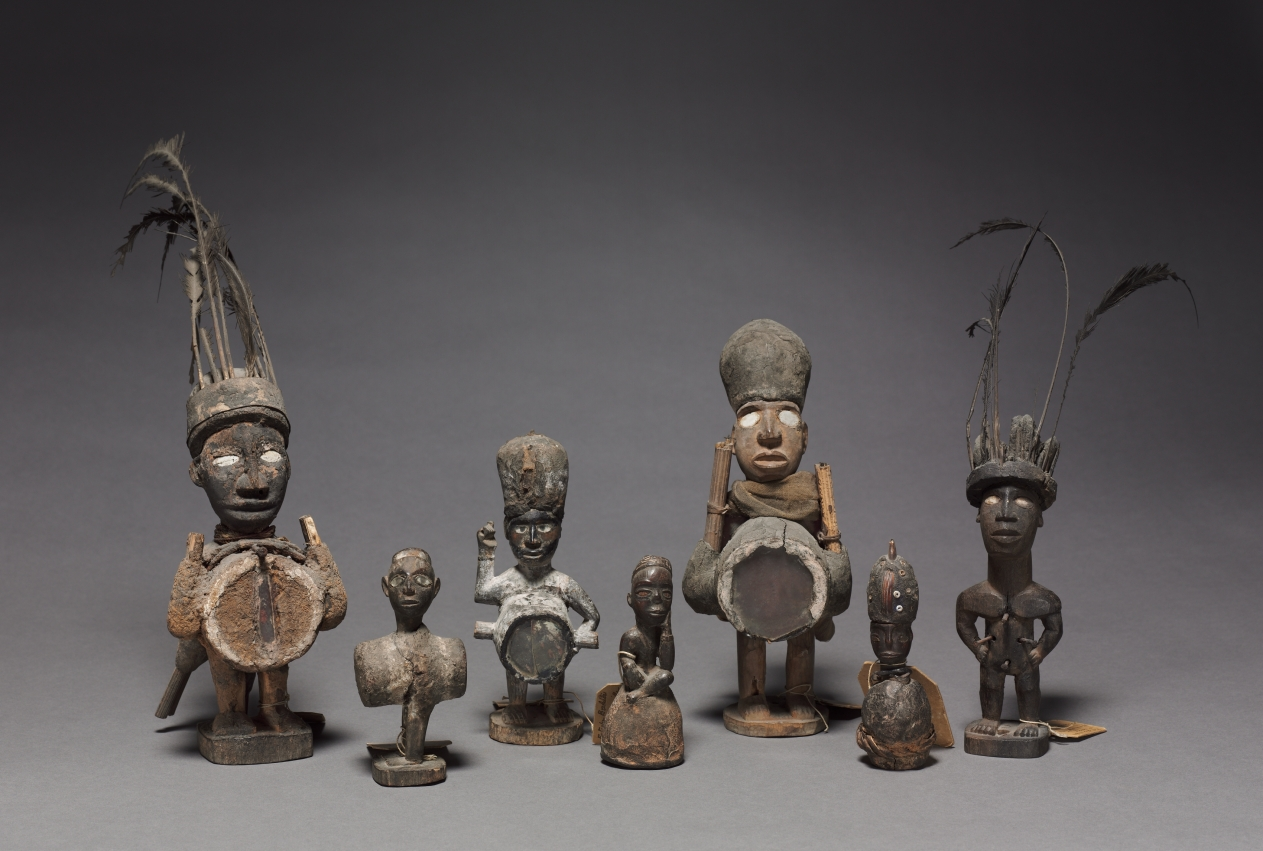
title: Power figure (nkisi)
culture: Africa, Central Africa, Republic of the Congo, Kongo-style maker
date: late 1800s–early 1900s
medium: Wood, organic materials (including resin), cloth, metalized glass, possibly porcelain, and plant fiber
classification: Sculpture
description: This figure is one of the two tallest of the seven anthropomorphic minkisi figurines previously in the Delenne collection. Identified as an nduda, two upward “guns” are attached on its side loaded with gunpowder used to shoot witches. Its label bears the word colique, a term referring to heavy pains caused by intestinal obstruction.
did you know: The object’s two small guns are pointing upward, but bears the label “colique,” a term referring to heavy pains caused by intestinal obstruction.